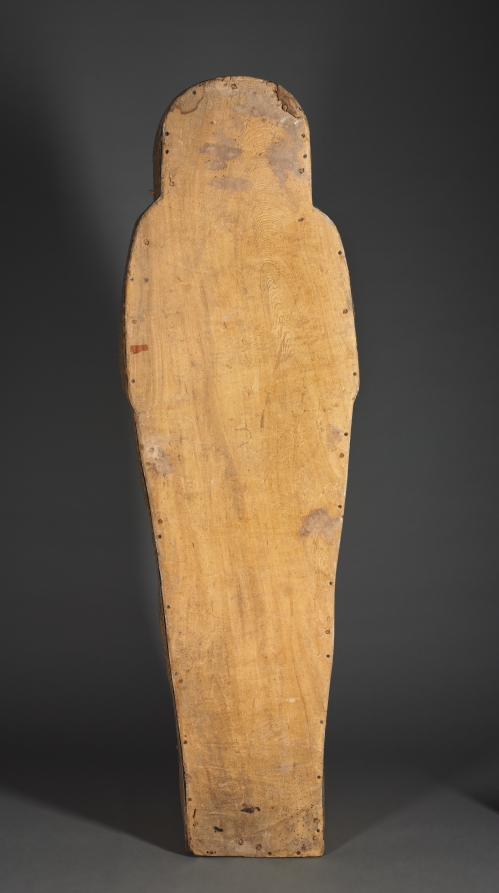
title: Coffin of Bakenmut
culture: Egypt, Thebes, Third Intermediate (1069–715 BCE), Dynasties 21–22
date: c. 1000–900 BCE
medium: gessoed and painted sycamore fig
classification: Funerary Equipment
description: The coffin of Bakenmut is one of the finest examples of painted wooden coffins made for the priests of Amen and their families at Thebes during Dynasty 21 and early Dynasty 22. The pharaohs of this time were no longer buried in the Valley of the Kings, but instead built tombs in the Delta, far to the north, where they resided. Security was lax in the Theban necropolis. The coffins and funerary goods of the wealthy citizens of Thebes were placed in unmarked and undecorated family tombs cut into the cliffs on the west bank of the Nile. All the care and detail that in more prosperous times were devoted to the decoration of the tomb chapel were now lavished on the elaborately painted coffins. Every available surface is crowded with religious scenes, images of funerary gods and goddesses, protective spells, and magical symbols. The deceased appears mummiform. An elaborate floral collar entirely covers the upper body, exposing only the separately attached hands (now lost). A pair of red "mummy braces" are crossed over the chest, their point of intersection marked by a winged sun disk. The lower body is covered with tiny figures modeled in gesso against a yellow background, which gives the effect of gold inlaid with glass or semiprecious stone. The decoration on the interior features two deified dead kings of Dynasty 18. Although these rulers had lived centuries before, memory of their greatness was still very much alive. The main scene near the top depicts Tuthmosis III, the great military pharaoh, who lived 500 years before Bakenmut. Posed as a mummy, the ruler wears a brilliant feathered garment enfolding him with falcon’s wings. The scene below features back-to-back seated images of Amenhotep I, regarded as the patron of the Theban cemetery and worshiped as a local god there.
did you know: Originally another smaller coffin was placed inside this outer coffin and in that the deceased with a mummy board would have rested.